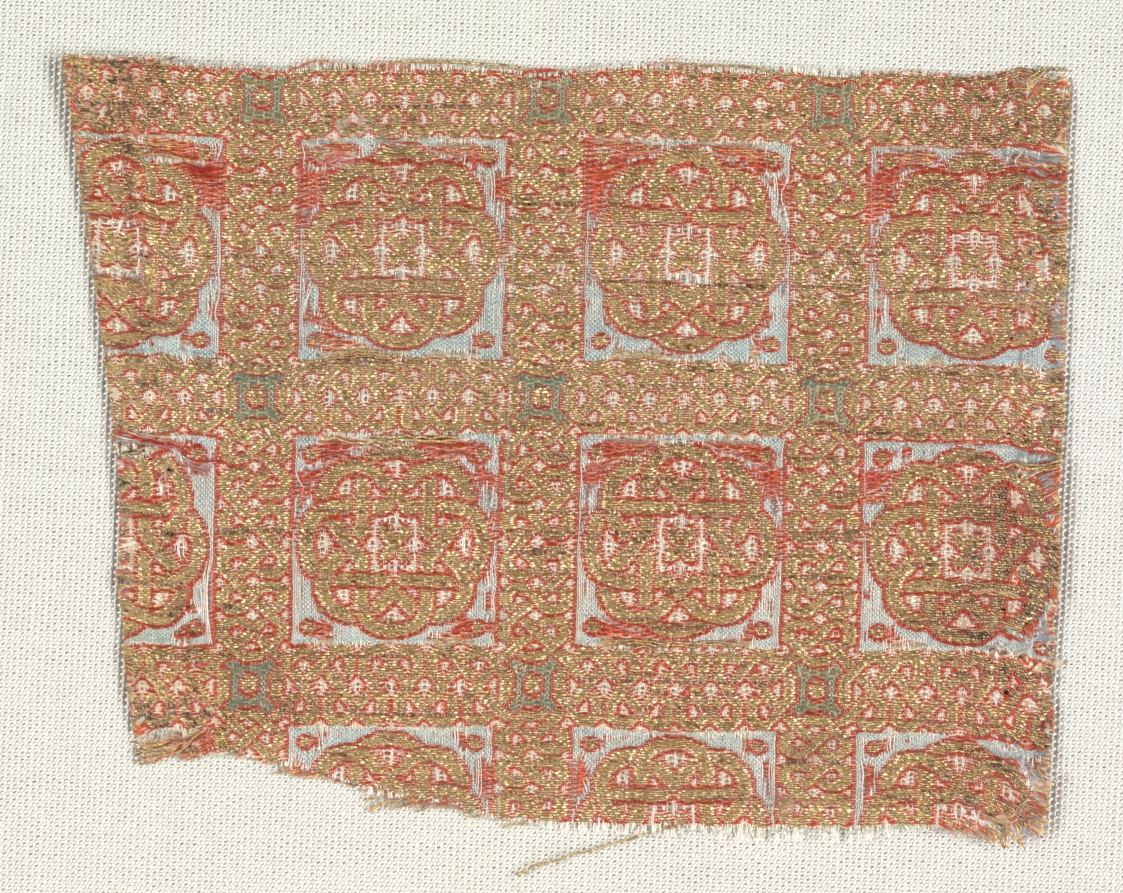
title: Fragment with stars in stacked squares, from a dalmatic of San Valero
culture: Spain, probably Almeria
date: 1200s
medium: lampas with areas of double cloth: silk and gold thread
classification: Textile